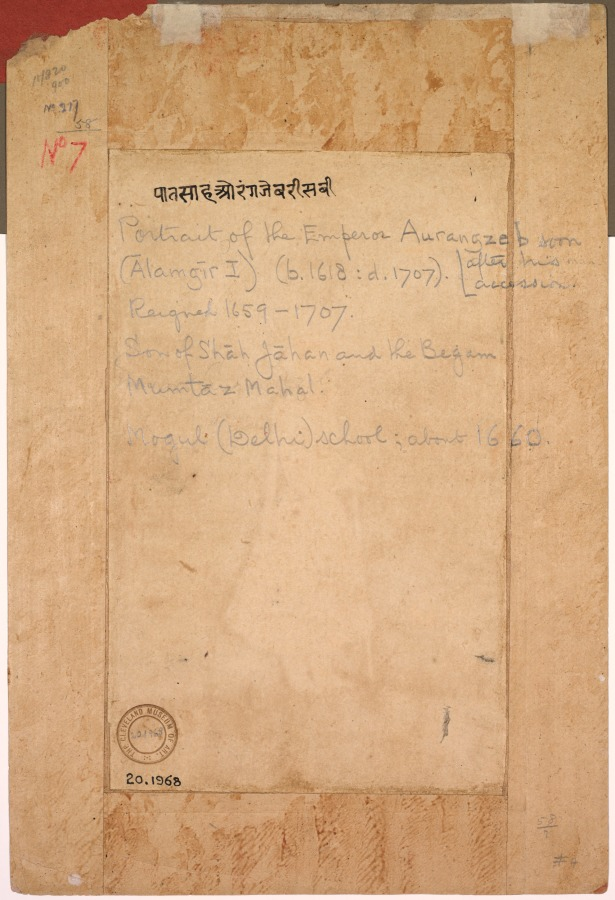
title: Aurangzeb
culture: India, Mughal Dynasty (1526-1756)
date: c. 1770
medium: color on paper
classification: Painting